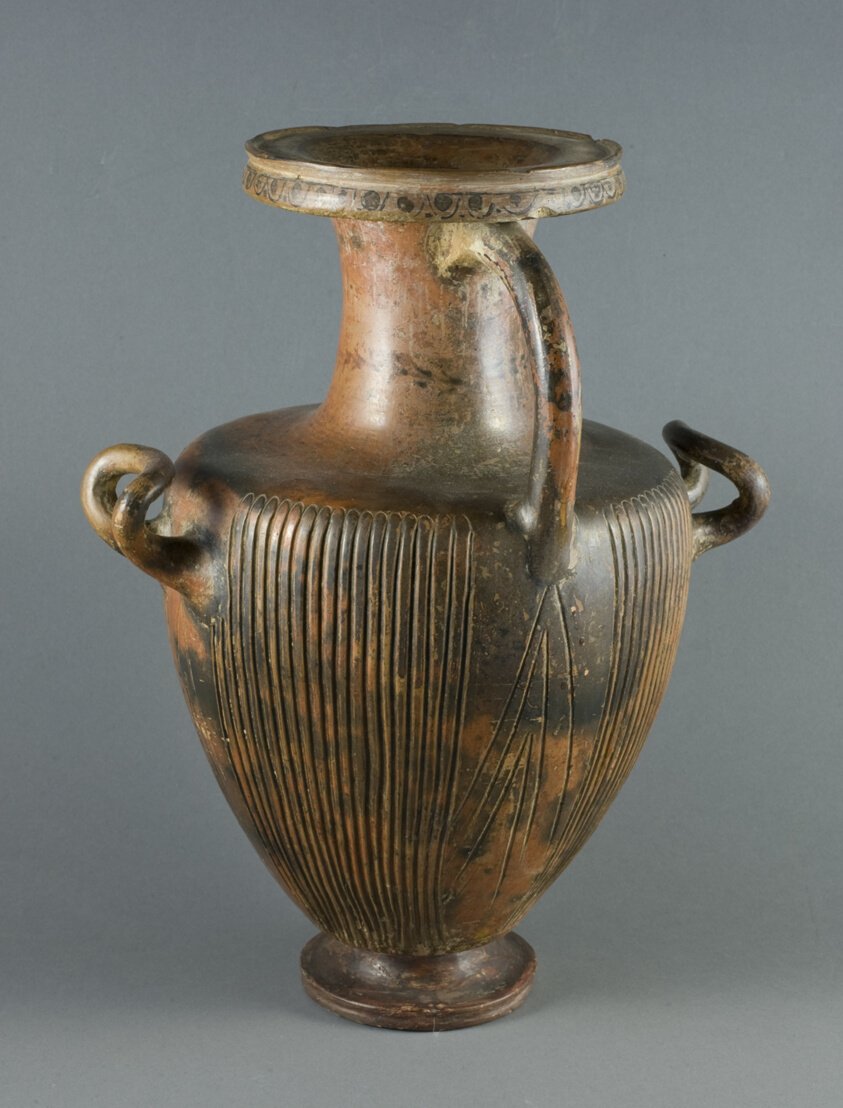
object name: Vessel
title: Hydria (Water Jar)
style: greek, ancient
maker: Greek; probably Campania, Italy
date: 400-350 BCE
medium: terracotta, black-glaze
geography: Greece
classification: vessel; ceramics; ancient art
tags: vases, vessels